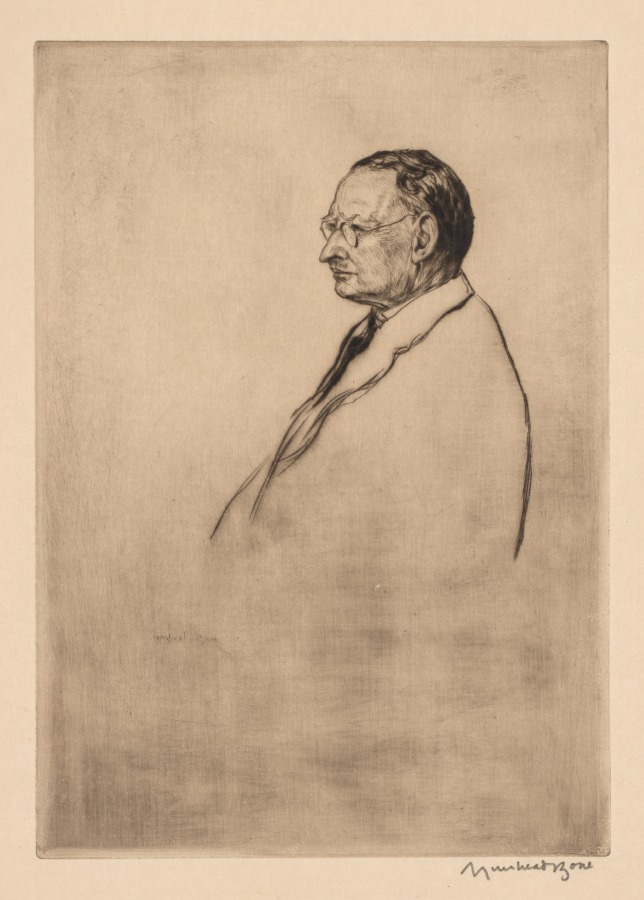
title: John Robertson, J. P., Dundee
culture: Britain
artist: Muirhead Bone (British, 1876–1953)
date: 1929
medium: drypoint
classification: Print